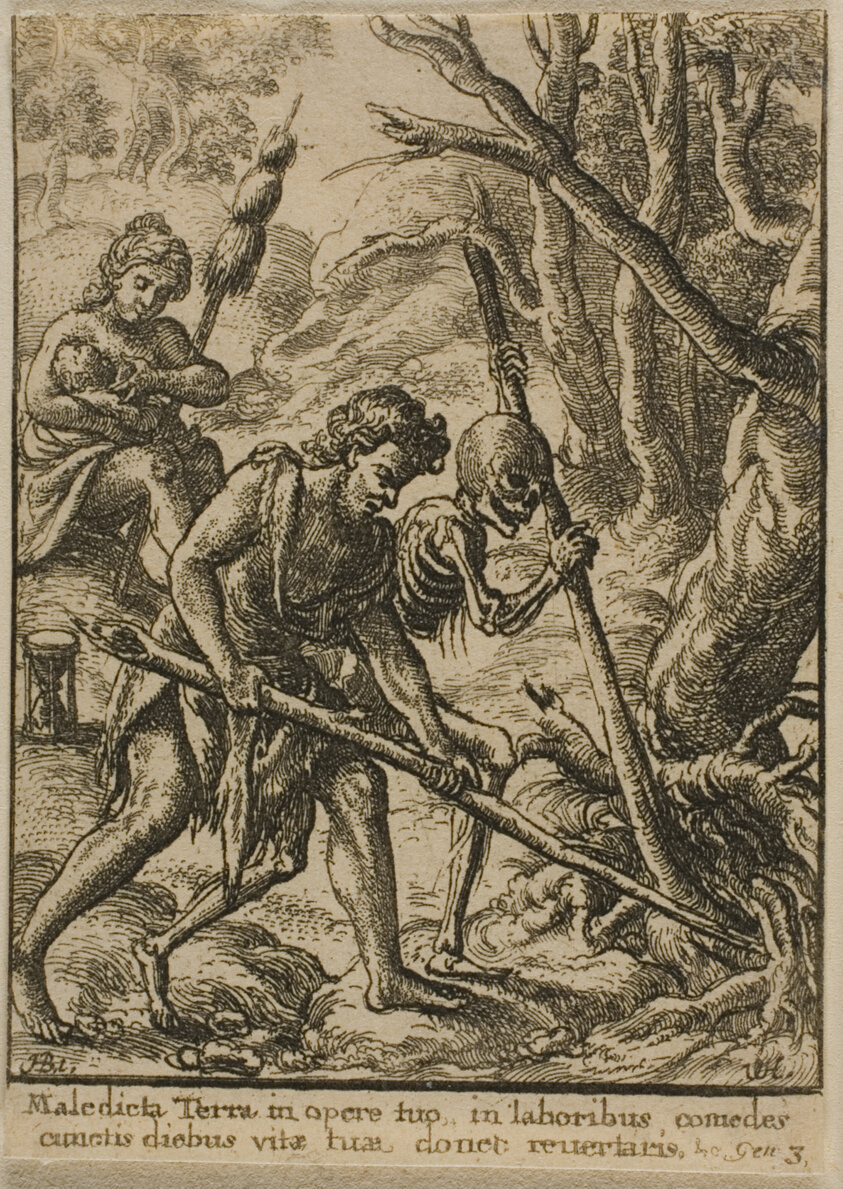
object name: Print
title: Adam Ploughing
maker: Wenceslaus Hollar (Bohemian, 1607-1677); after Hans Holbein the younger (German, c.1497-1543)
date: 1651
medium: Etching on ivory wove paper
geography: Bohemia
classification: etching; print; prints and drawing